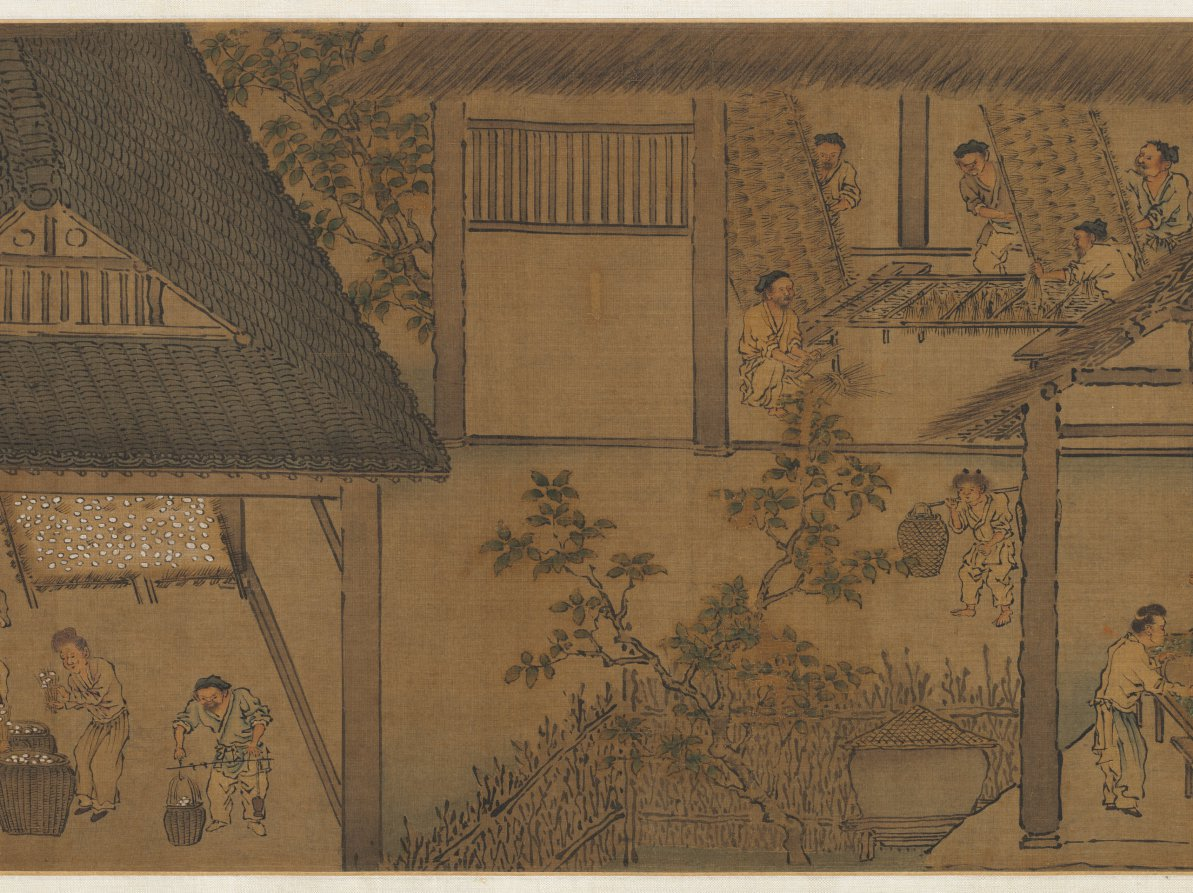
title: Sericulture (The Process of Making Silk)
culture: China, Southern Song dynasty (1127-1279)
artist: attributed to Liang Kai (Chinese, mid-1100s–early 1200s)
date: early 1200s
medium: Handscroll; ink and color on silk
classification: Painting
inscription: 3 colophons and 7 seals of Ch'eng Ch'i (20th c.).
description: By the Southern Song period, the economic center of the silk industry had shifted to the lower Yangzi delta, while the north continued to be troubled by wars. Divided into three sections, the handscroll illustrates 14 steps in the process of making silk, from the raising of silkworms to the weaving of silk cloth. The scroll’s scenes follow the illustrations of Lou Shou’s (1090–1162) Pictures of Tilling and Weaving (gengzhi tu), the first recorded painting of this genre, which was conceived in Hangzhou around 1145. However, in the Cleveland painting the artist groups several scenes of sericulture together under the roof of an open structure.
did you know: The painting is attributed to Liang Kai, a court artist active from about 1201 to 1204 at the Imperial Painting Academy in the city of Hangzhou, a major silk weaving center from that time to the present day.